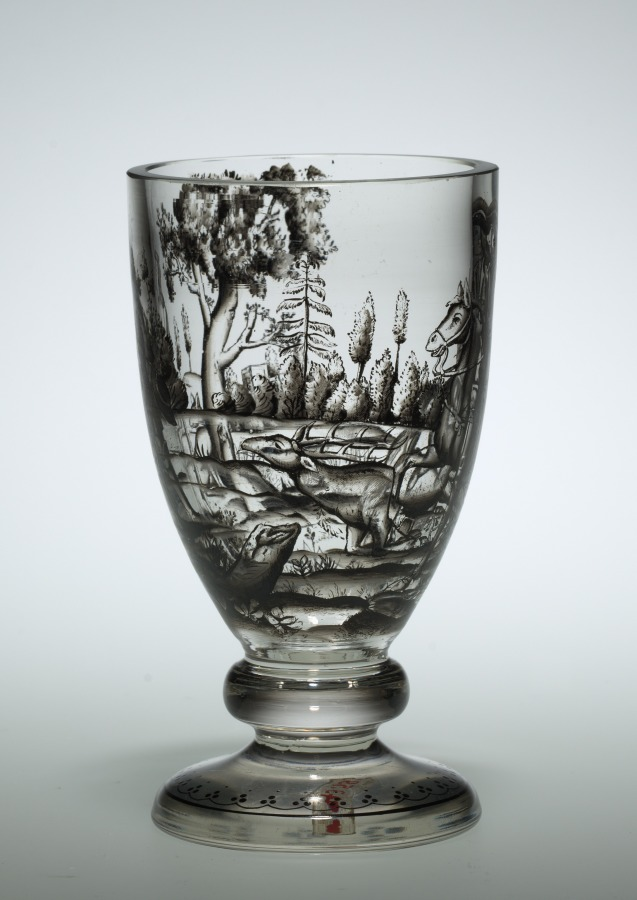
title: Glass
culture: Germany, 18th century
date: c. 1730–1750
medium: glass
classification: Glass